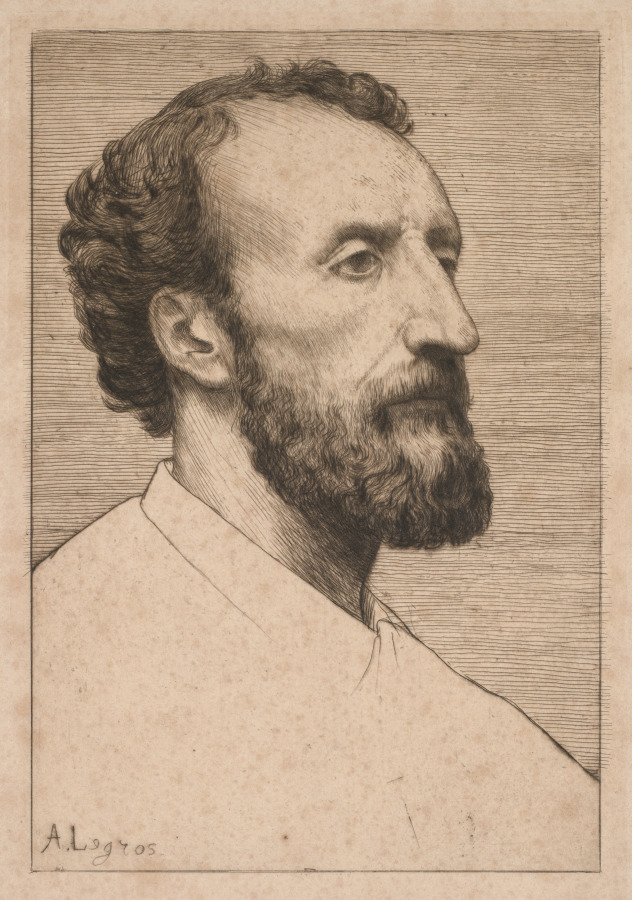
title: Jules Dalou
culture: France, 19th cenetury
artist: Alphonse Legros (French, 1837–1911)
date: 1877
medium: etching and drypoint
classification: Print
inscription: signed lower left, in the plate: A. Legros